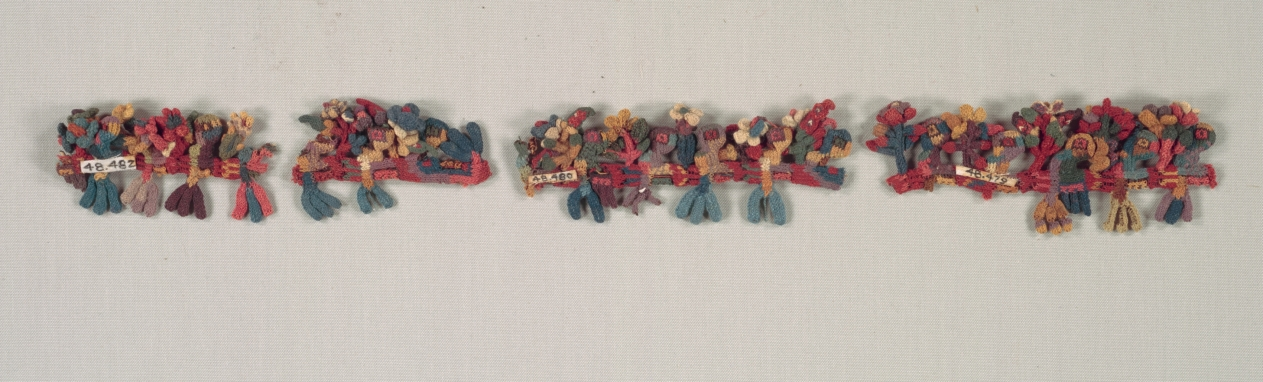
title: Border Fragment with Birds and Flowers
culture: Peru, South Coast, Nasca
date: 100 BCE–700 CE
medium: embroidery of polychrome wools on cotton foundation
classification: Embroidery